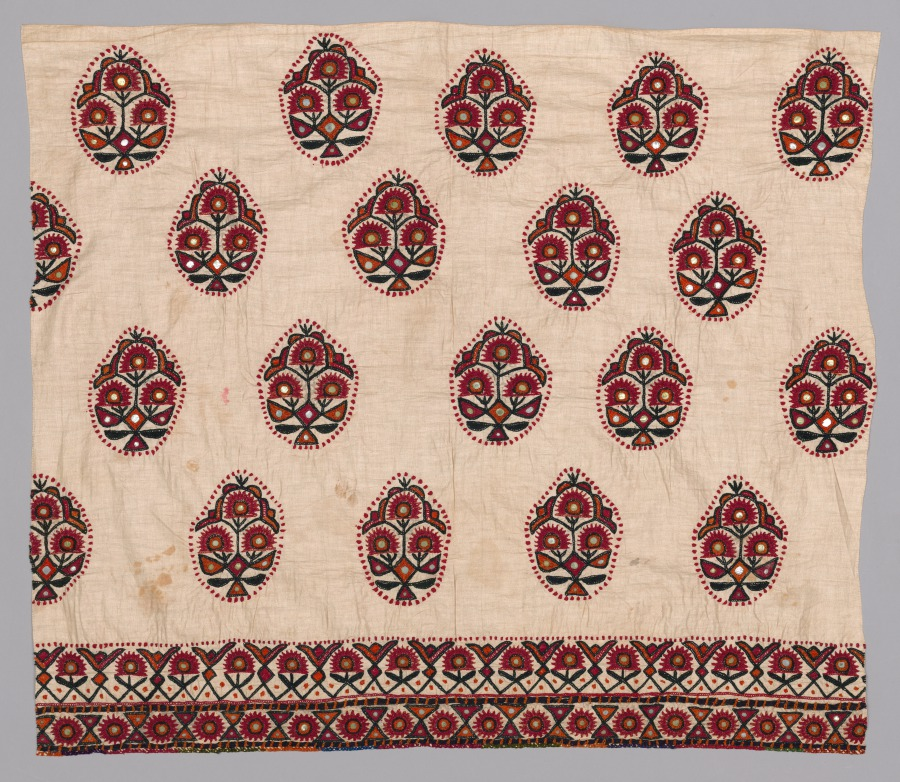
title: Skirt Panel (?)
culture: Western India, Gujarat, Kachchh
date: early 1900s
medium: silk on cotton tabby ground, embroidery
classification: Embroidery